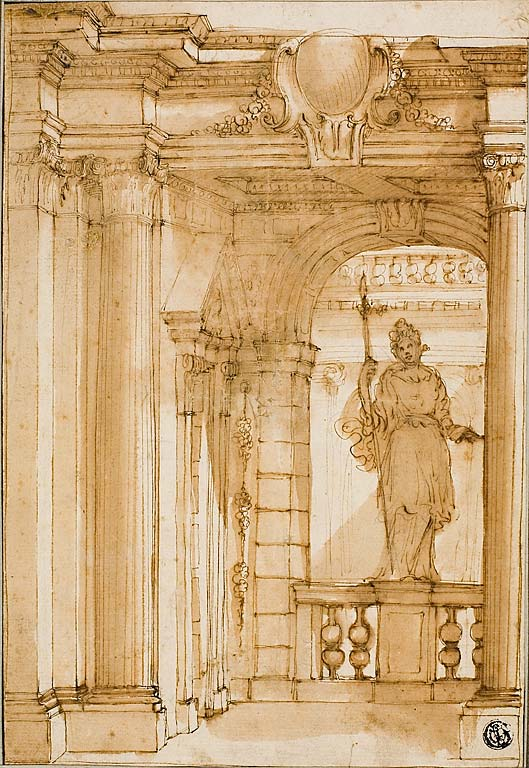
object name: Drawing and Watercolor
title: Corner of a Loggia with Female Statue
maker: Attributed to Pietro Righini; Italian, 1683-1742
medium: Pen and brown ink, with brush and brown wash, over traces of graphite, on ivory laid paper, laid down on ivory laid paper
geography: Italy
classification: ink or chalk wash; drawings (visual works); prints and drawing